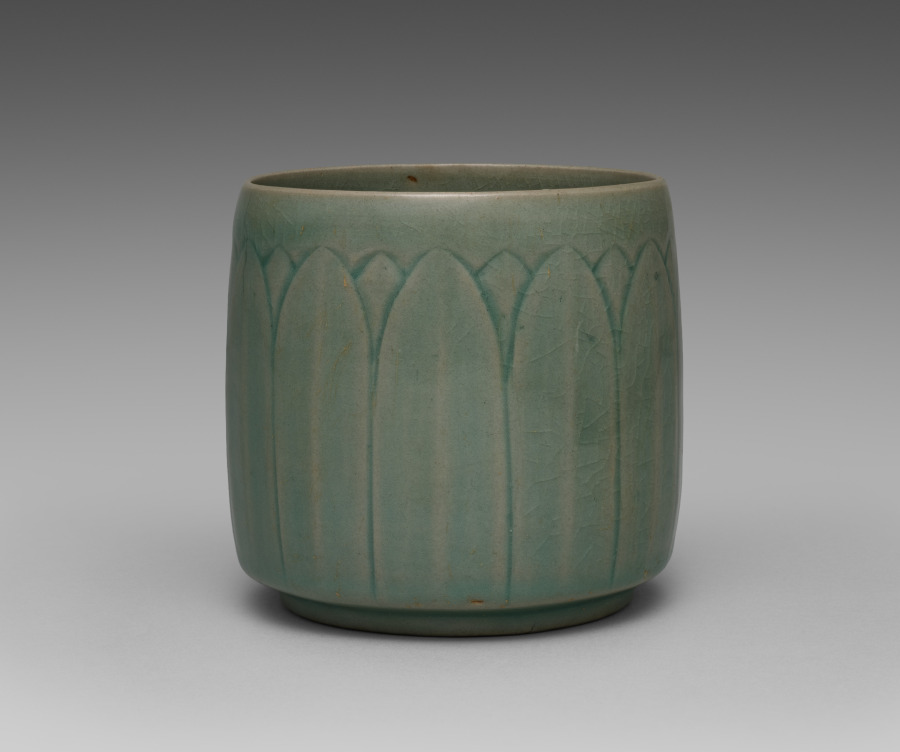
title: Celadon Cup with Molded Lotus Petal Design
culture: Korea, Goryeo dynasty (918–1392)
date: 1100s–1200s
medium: Celadon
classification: Ceramic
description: Celadon wares intended for everyday use—such as this dish—were among the most common burial objects placed in tombs during the Goryeo period (918–1392). Furnishing tombs with elaborate assemblages of objects was believed to honor the deceased and provide comfort in the afterlife. This dish, featuring the lotus petal motif, was likely a cherished possession that accompanied its owner to their final resting place.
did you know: The outer wall of this teacup is decorated with the image of lotus flower petal, a symbol of purity and salvation.